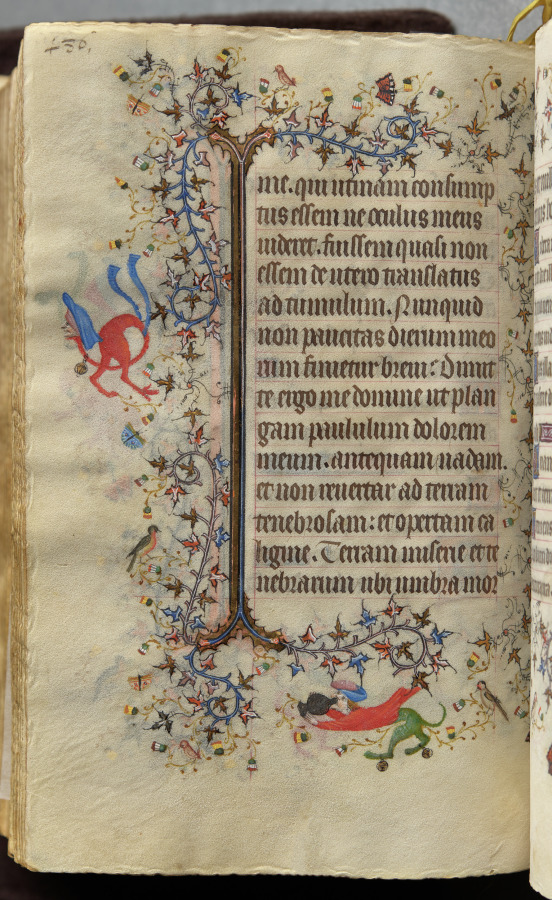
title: Hours of Charles the Noble, King of Navarre (1361-1425): fol. 237v, Text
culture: France, Paris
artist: Master of the Brussels Initials and Associates (French)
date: c. 1405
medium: ink, tempera, and gold on vellum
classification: Bound Volume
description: This precious volume was obviously highly prized by its owner, the French-born King of Navarre, who had his coat of arms painted on no less than twenty folios. Rather than directly commissioning this manuscript from a specific workshop, it seems that Charles the Noble acquired his book of hours -- perhaps ready-made for the luxury market -- while on a trip to Paris in 1404-05. A collaborative effort, six painting styles are evidenced within the pages of this codex, those of two Italians, two Frenchmen, and two Netherlanders. The painter who was responsible for the planning and decoration of the book, and who produced seventeen of the large miniatures, was a Bolognese artist known as the Master of the Brussels Initials. His principal assistant, responsible for most of the borders, was a Florentine who signed his name "Zecho" da Firenze on folio 208 verso.